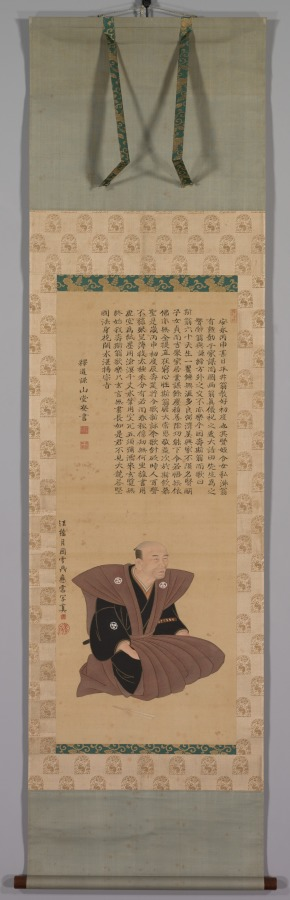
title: Portrait of Samurai-Official: Hirai KyoseiHirai Kyosei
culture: Japan, Edo period (1615–1868)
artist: Tsukioka Settei (Japanese, 1710–1786)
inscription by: Sando Hyosho (Japanese)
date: 1776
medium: hanging scroll; ink and color on silk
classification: Painting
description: In this pair of figure paintings, the artist provided generational portraits of two clan leaders from the Hirai family, accompanied by lengthy inscriptions in a distinctive calligraphic style from separate scholar-officials.